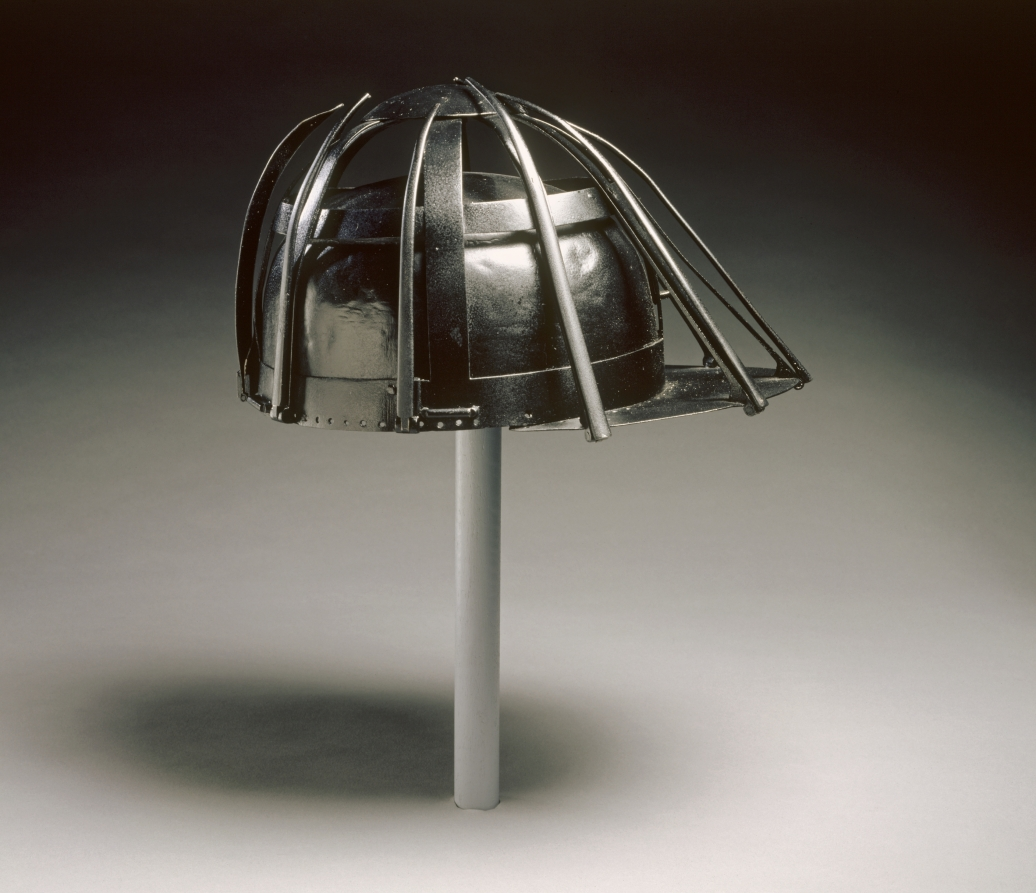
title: Cavalry Spider Helmet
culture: France, 17th century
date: 1600s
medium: iron with black paint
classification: Arms and Armor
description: The "spider-like" legs of this helmet protected the mounted soldier's face and head from slashing sword blows. The legs could be raised and locked up out of the way when not required.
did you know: This helmet was made specifically for use in the field by the light cavalry who wore only a half suit of armor, sturdy riding boots, and an open helmet.